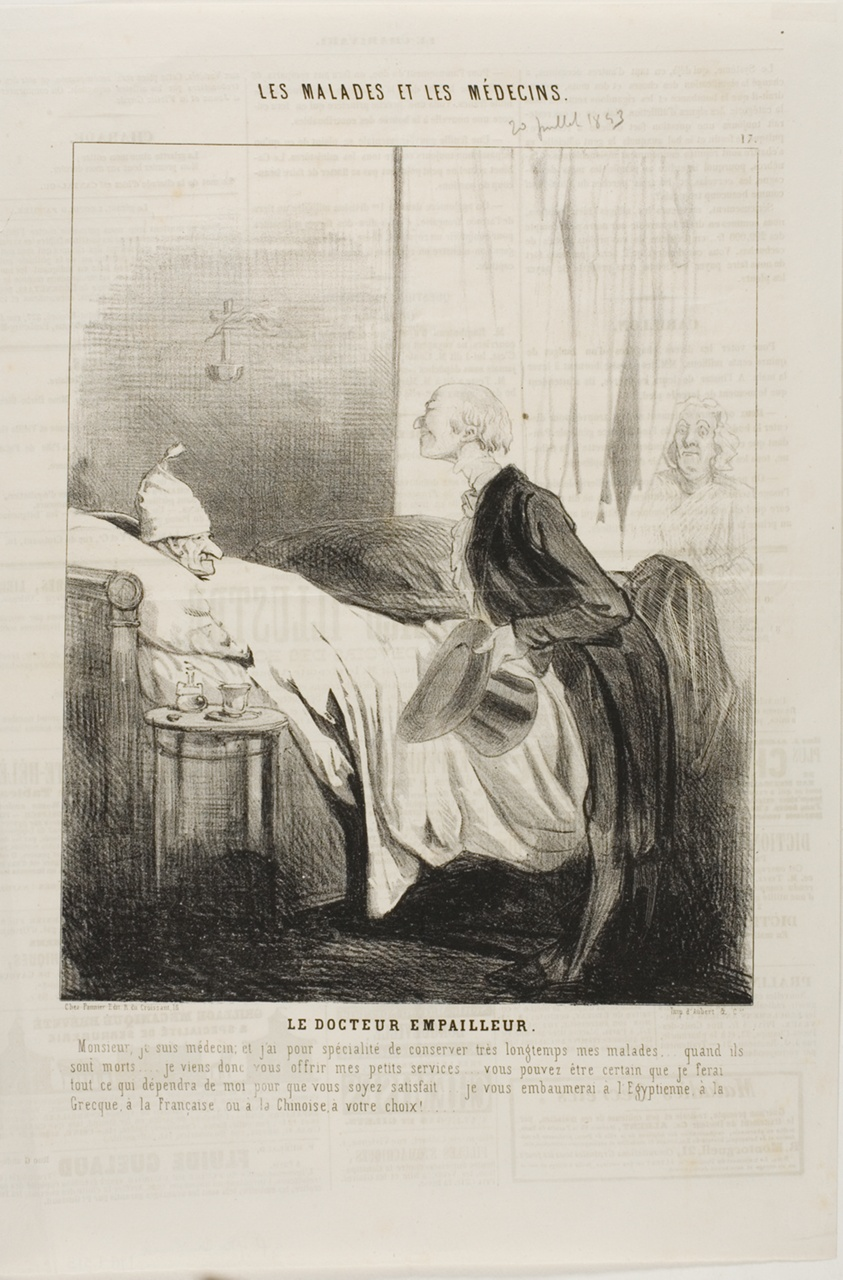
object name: Print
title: The Taxidermist Doctor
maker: Charles Émile Jacque (French, 1813-1894)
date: 1843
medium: Lithograph in black on ivory wove paper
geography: France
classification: lithograph; print; prints and drawing